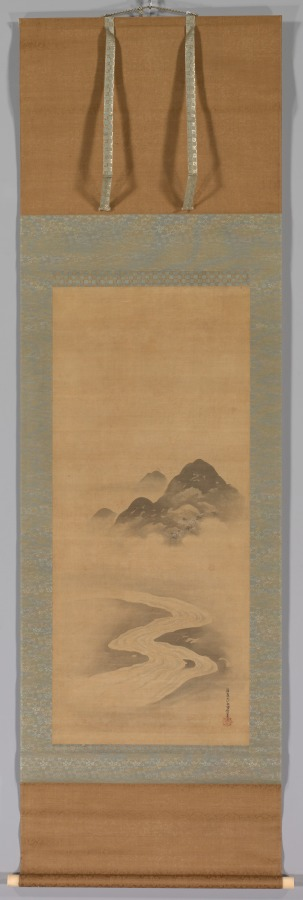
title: Minamoto no Nakakuni Visits Lady Kogō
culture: Japan, Edo period (1615–1868)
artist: Kiyohara Yukinobu (Japanese, 1643–1682)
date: late 1600s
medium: One of a triptych of hanging scrolls; ink and color on silk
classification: Painting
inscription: 款記「清原氏女雪信筆」/「清原女」朱文八角印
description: Kiyohara Yukinobu was one of Japan's earliest and most talented female painters. Kiyohara preferred Japanese-style painting techniques and subjects. Her work depicts the scenery and history of her native land. In addition to the tonalities of ink, she applied a delicate range of colors that help identify the seasons, an important theme in Japanese life and culture.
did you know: This day-lit spring scene is the right part of a triptych presenting an episode from The Tale of the Heike.